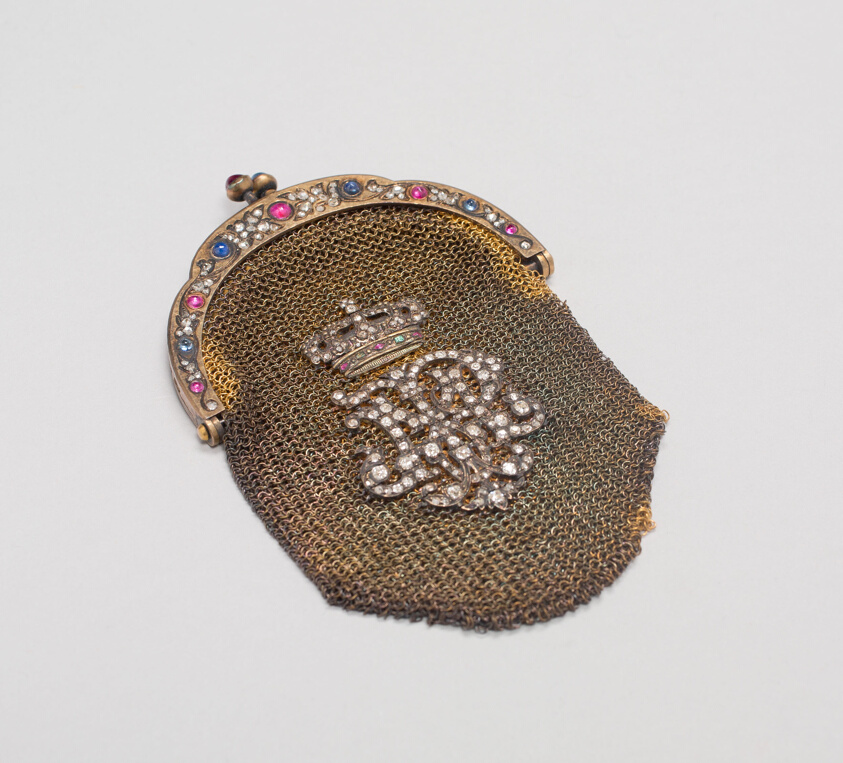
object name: Metalwork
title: Miniature Evening Purse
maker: Russia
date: c. 1890/1900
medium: Gold, sapphires, emeralds, rubies, and diamonds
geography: Russia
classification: costume accessory - bag; costume accessory; european decorative arts; metalwork